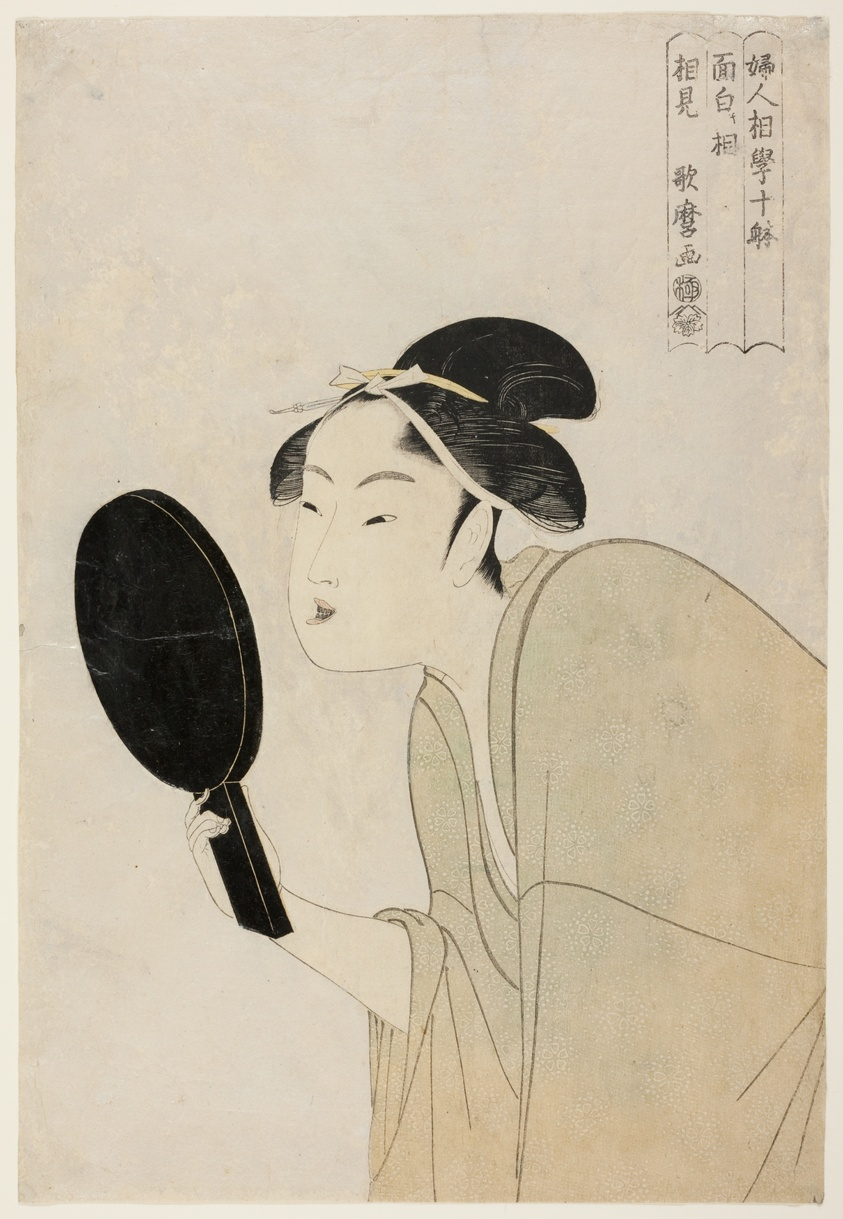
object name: Print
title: The Interesting Type (Omoshiroki so), from the series “Ten Types in the Physiognomic Study of Women" ("Fujin sogaku juttai")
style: Japanese (culture or style)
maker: Kitagawa Utamaro 喜多川 歌麿; Japanese, 1753 (?)-1806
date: c. 1792/93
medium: Color woodblock print; oban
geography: Japan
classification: woodblock print; print; asian art